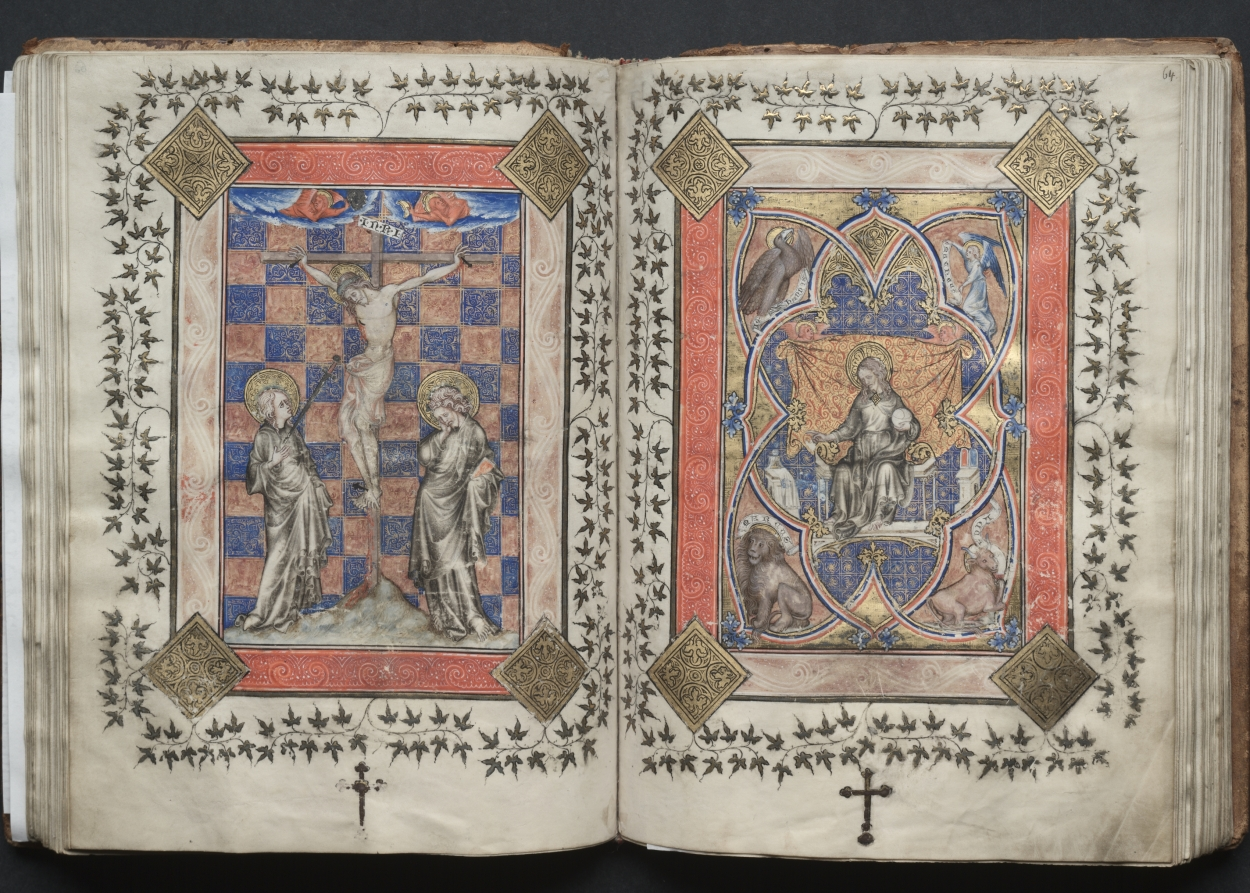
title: The Gotha Missal: Fol. 64r, Christ in Majesty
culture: France, Paris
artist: Master of the Boqueteaux (French)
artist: and Workshop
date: c. 1375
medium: ink, tempera, and gold on vellum; blind-tooled leather binding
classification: Bound Volume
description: The style and quality of this manuscript's decoration is typical of deluxe Parisian books made for aristocratic or royal patrons. Most of the book's decoration appears to be the work of the Master of the Boqueteaux, an artist active at the court of King Charles V (died 1380). His style was apparently shared by a number of book illuminators working in and around Paris. It is very possible that the Gotha Missal belonged to Charles V, but is not provable because the manuscript has no royal portraits and lacks a colophon. Given the book's magnificent decoration, however, it would seem that it was produced for a Valois prince, if not for the king himself. The manuscript receives its name from the German dukes of Gotha, its later owners.